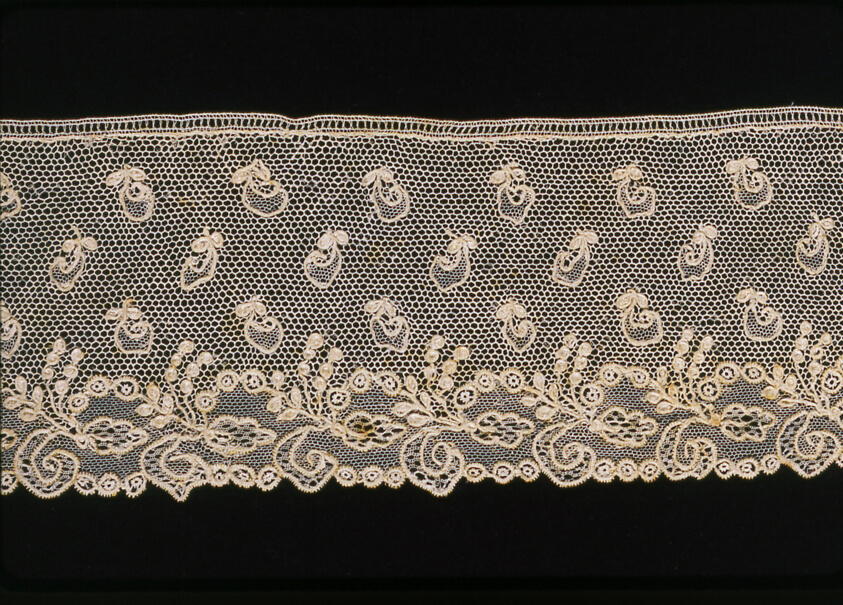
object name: Textile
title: Border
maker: France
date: 1880s/90s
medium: Linen and horsehair, needle lace of a type known as "Point d'Argentan" with whipped mesh ground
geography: France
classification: textile; lace - needle